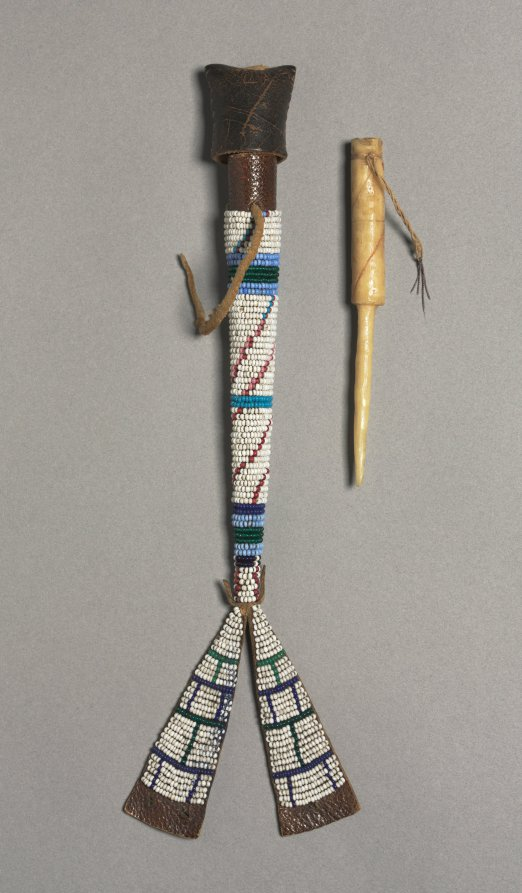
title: Bone Awl with Beaded Case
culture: America, Native North American, Gaigwu (Kiowa), late 19th century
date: late 1800s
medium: bone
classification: Implements